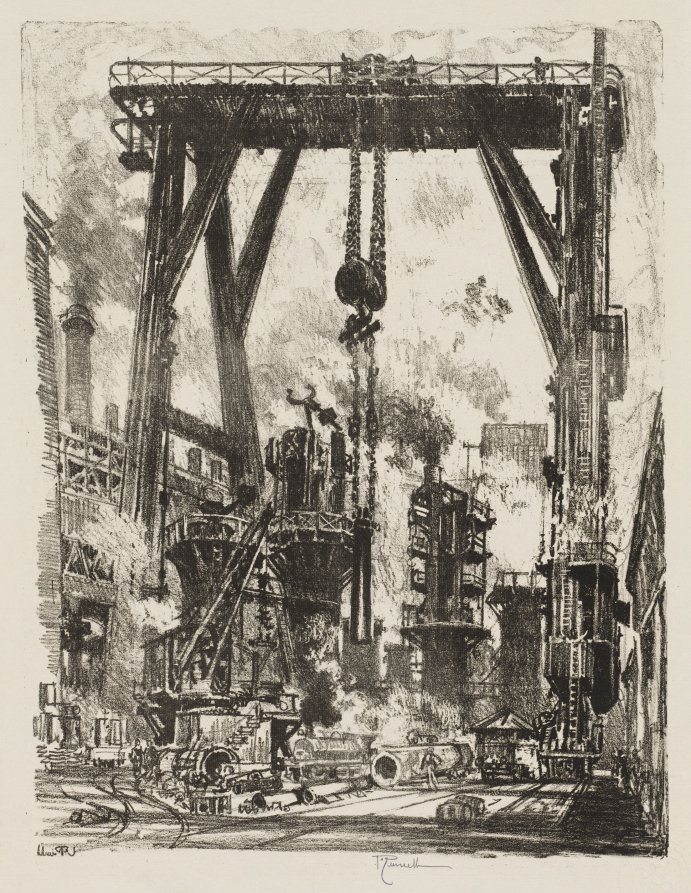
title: English War Work: The Old Gun Pit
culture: America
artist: Joseph Pennell (American, 1857–1926)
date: 1916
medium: lithograph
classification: Print